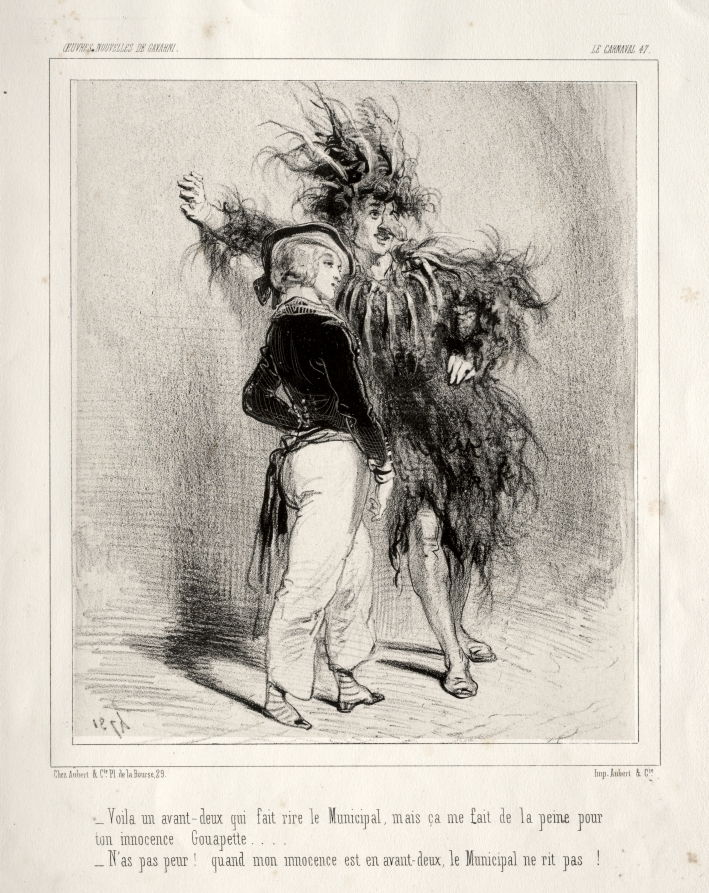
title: Carnaval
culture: France, 19th century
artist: Paul Gavarni (French, 1804–1866)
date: c. 1841–47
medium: lithograph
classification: Print